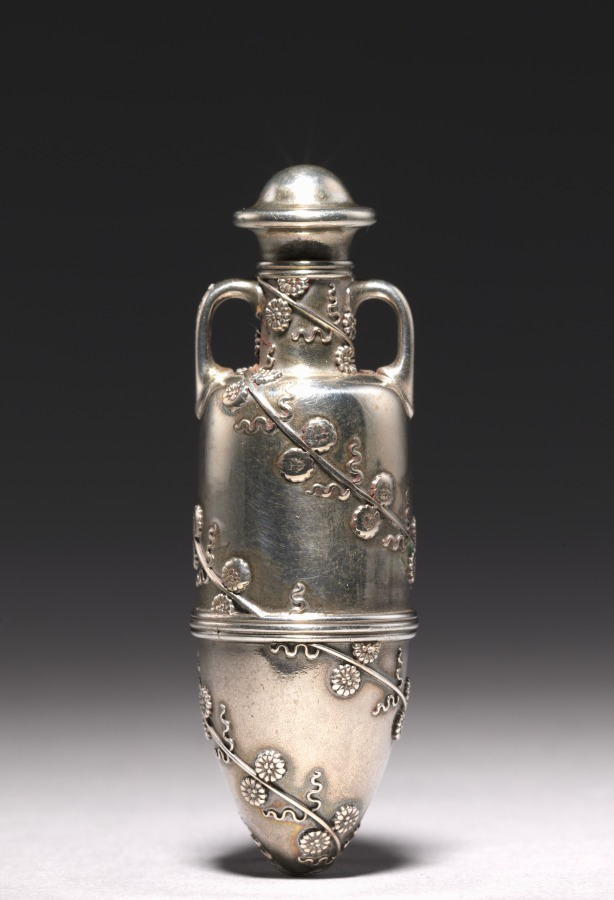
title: Scent Bottle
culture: America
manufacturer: Tiffany & Co. (America, New York, est. 1837)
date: c. 1860–70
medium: silver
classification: Silver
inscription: Inside mark: Tiffany & Co. 2662 (...) - this is too small to read M2108 Union Square